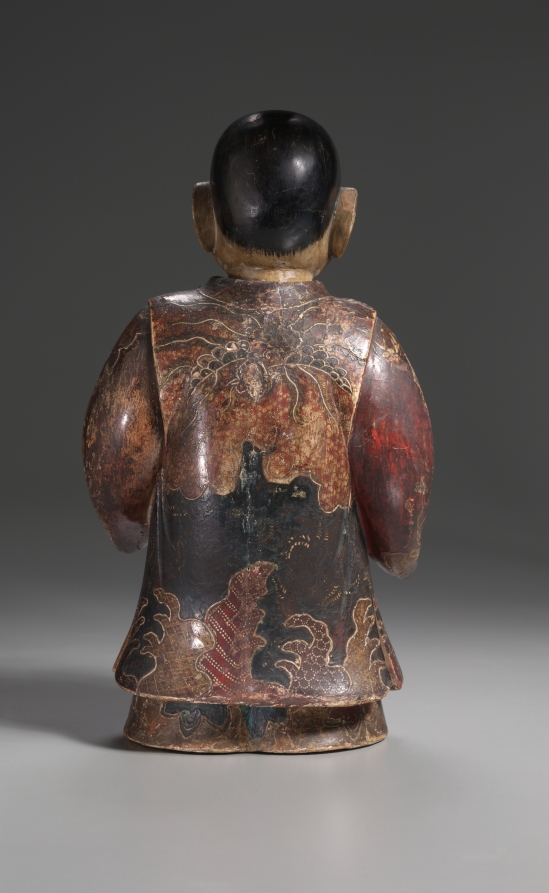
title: Boy with Puppy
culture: Japan, Edo period (1615–1868)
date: c. 1800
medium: wood with lacquer and color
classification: Sculpture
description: This is a Saga doll, a type of doll thought to have originated in 16th-century Saga, outside of Kyoto. The colors and patterns of the doll’s robe resemble the fashion of the latter part of the Momoyama period (1573–1615). The doll is a nodder, with its head carved separately; when its head moves, its tongue sticks out.